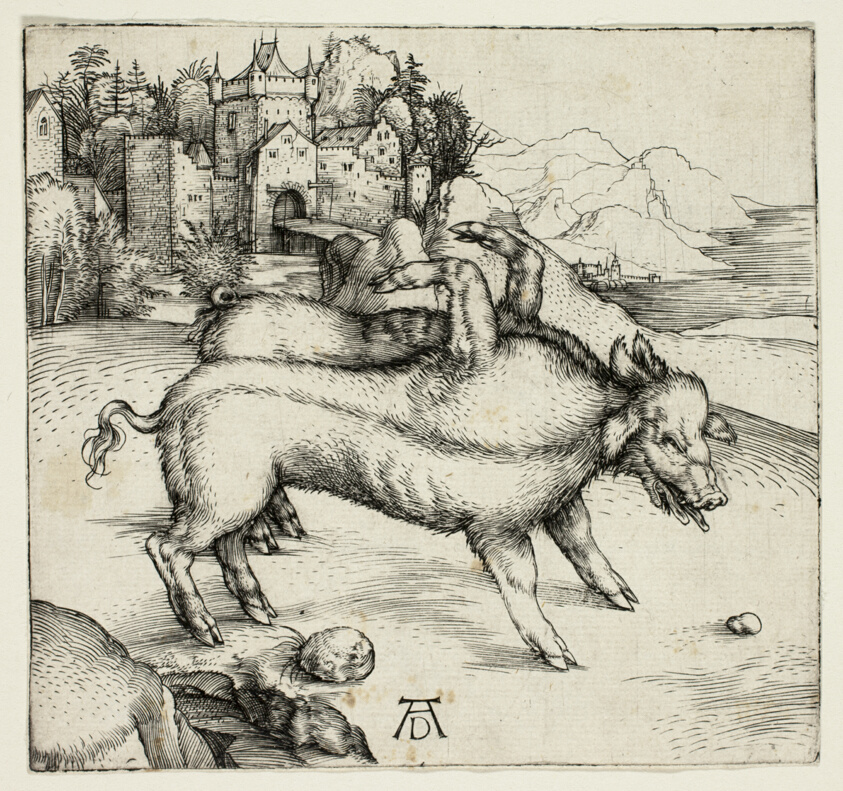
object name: Print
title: The Monstrous Sow of Landser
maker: Albrecht Dürer (German, 1471-1528)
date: 1496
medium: Engraving in black on ivory laid paper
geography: Germany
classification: engraving; print; prints and drawing; paper